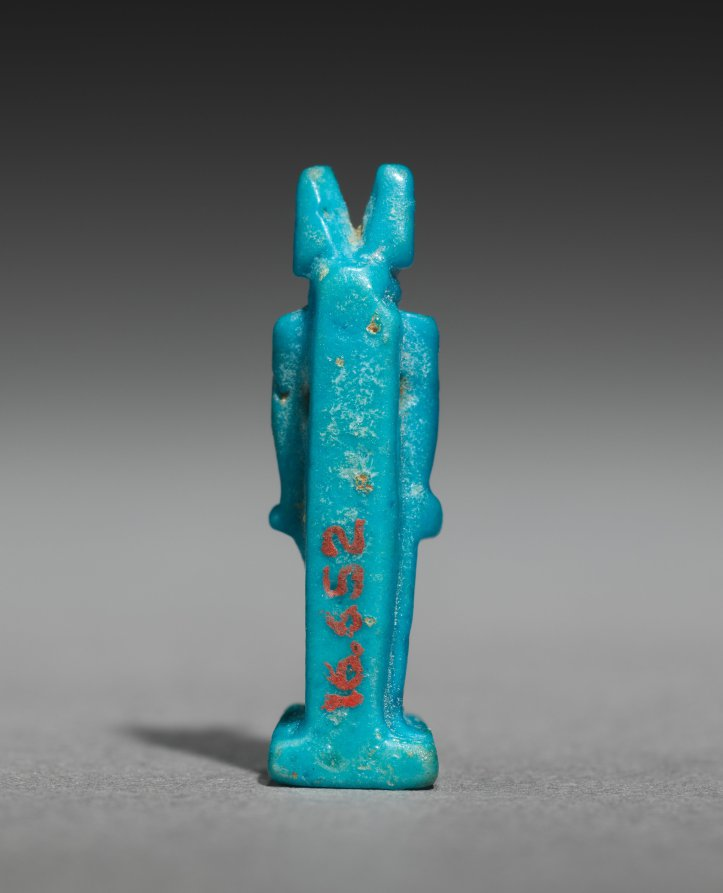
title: Amulet of Anubis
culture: Egypt, Late period (715–332 BCE), Dynasties 27–31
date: 525–332 BCE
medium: turquoise faience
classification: Amulets